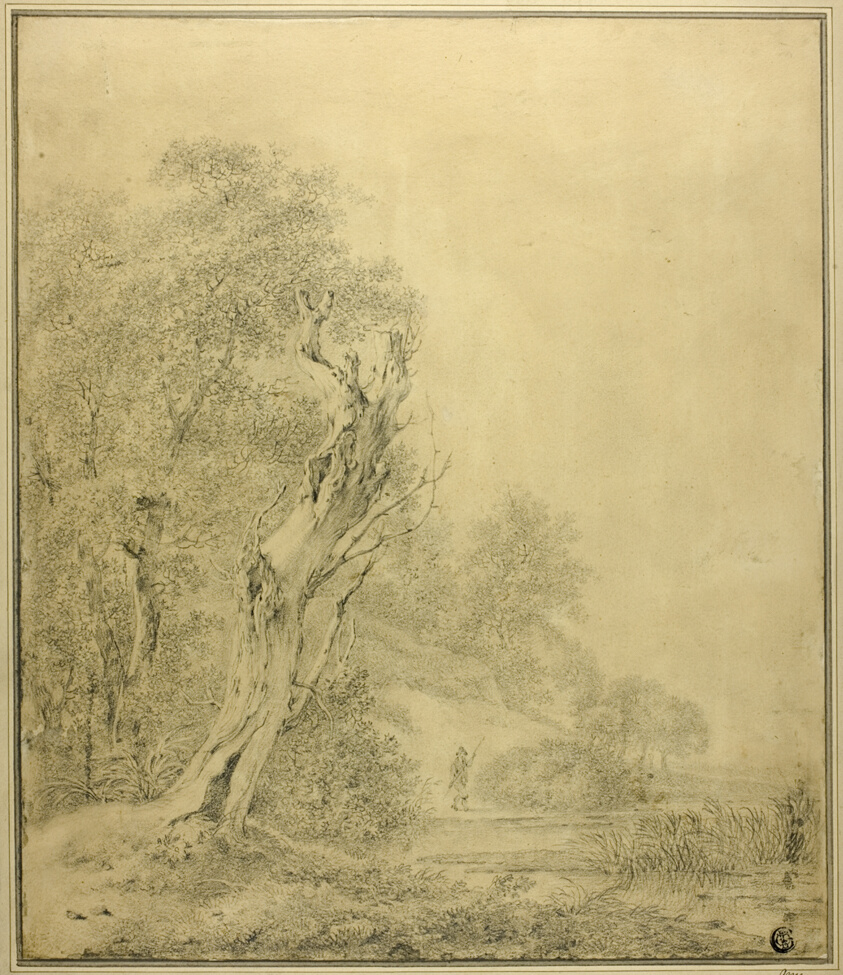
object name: Drawing and Watercolor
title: Dead Tree at Water's Edge, Figure Approaching with Pole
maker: Possibly Jacob vsn Ruisdael; Dutch, 1628/29-1682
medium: Graphite, on cream wove paper, laid down on board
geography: Holland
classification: graphite; drawings (visual works); prints and drawing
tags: landscapes